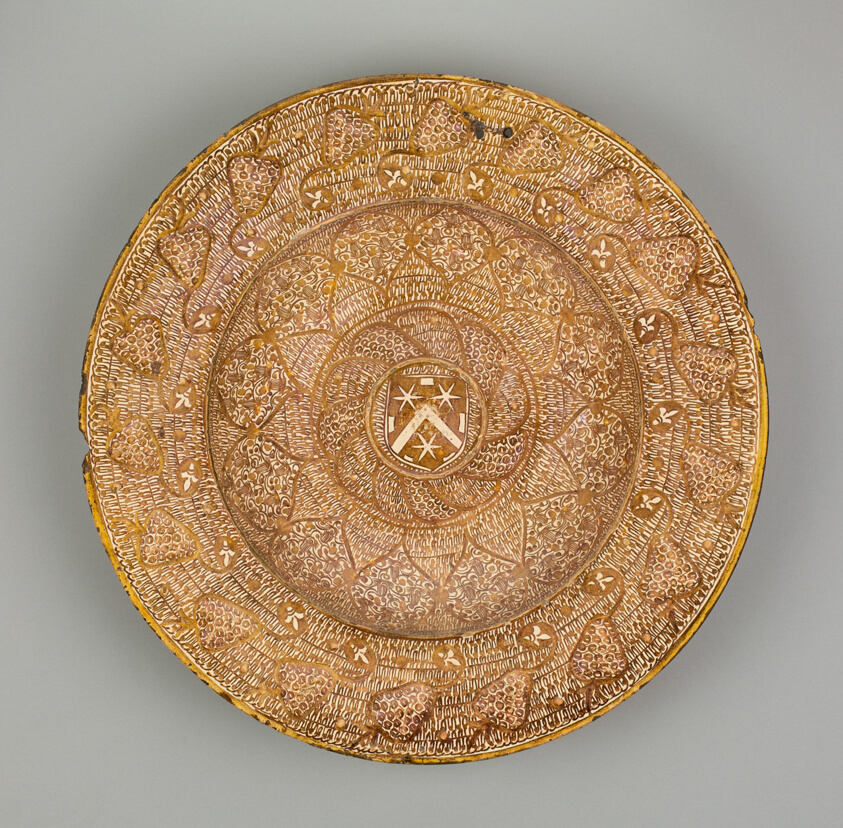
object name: Ceramics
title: Plate with Unidentified Coat of Arms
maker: Spanish; Valencia (probably Manises)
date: 1500/25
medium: Tin-glazed earthenware with copper luster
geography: Valencia region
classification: earthenware; ceramics; european decorative arts; decorative arts